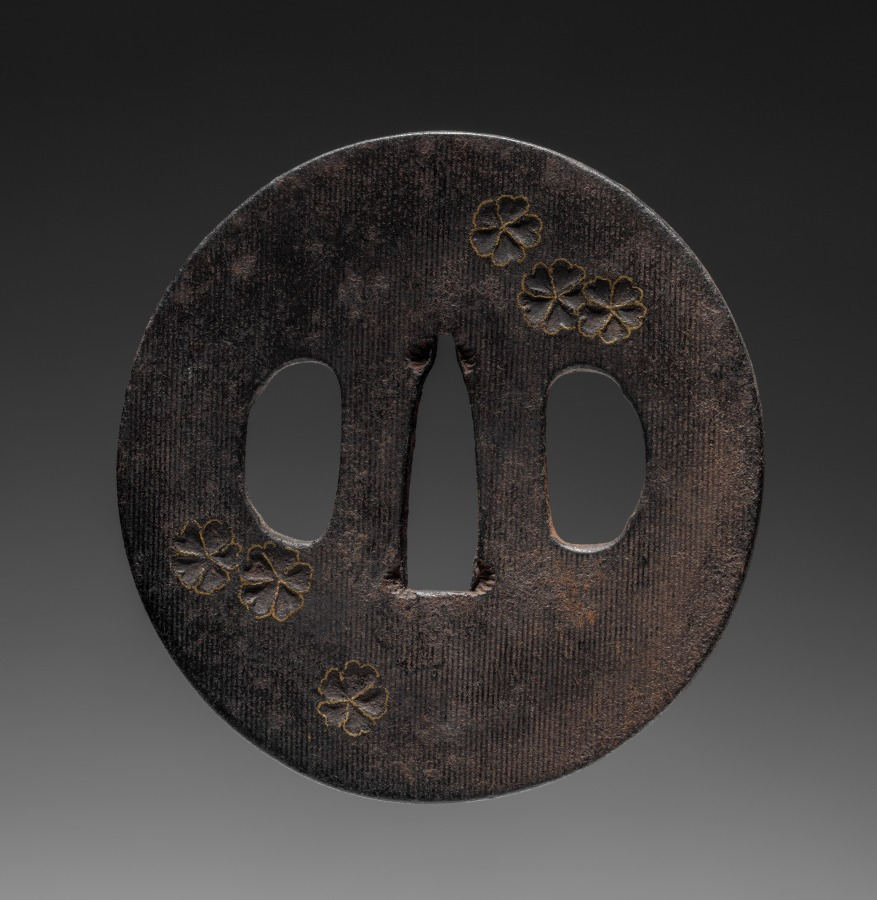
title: Sword Guard (Tsuba) with Cherry Blossoms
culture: Japan, possibly Edo period (1615–1868)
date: c. 1615–1868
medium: metal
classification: Arms and Armor